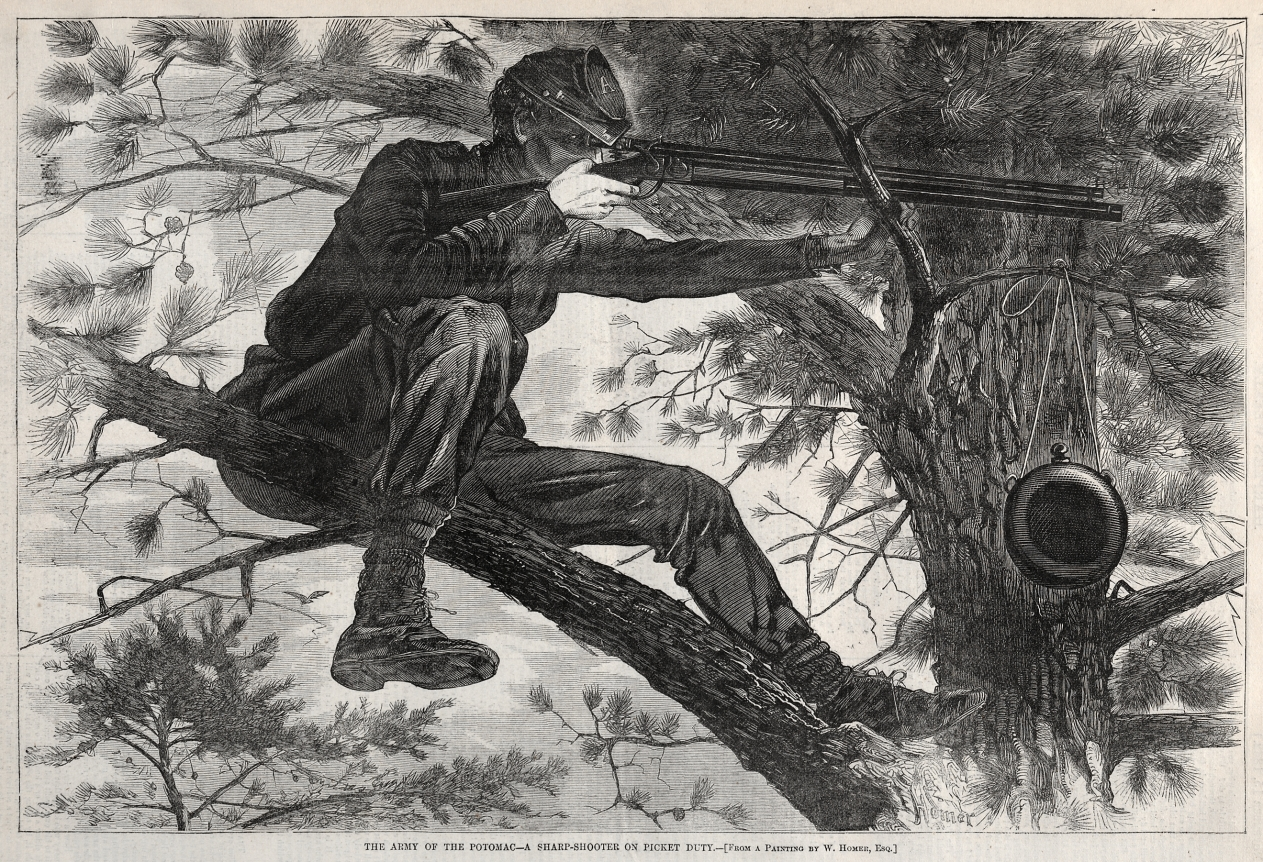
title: A Sharpshooter on Picket Duty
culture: America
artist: Winslow Homer (American, 1836–1910)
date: 1860s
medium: wood engraving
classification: Print